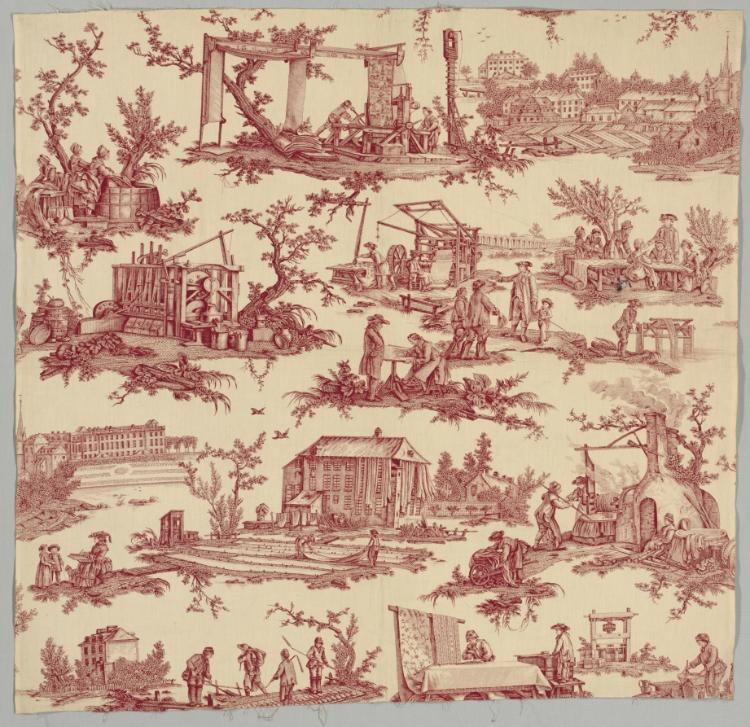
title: Les Travaux de la Manufacture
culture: France, Late 18th century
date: c. 1790s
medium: plain weave cotton, printed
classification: Textile